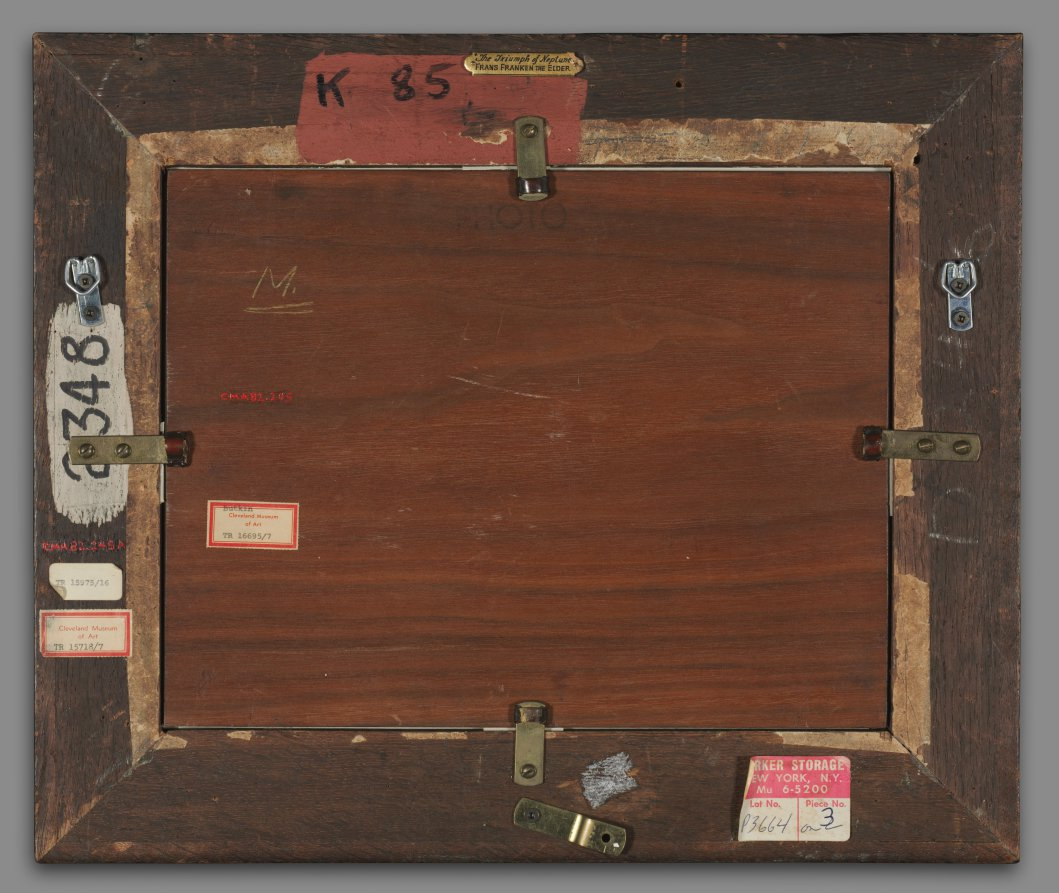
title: The Triumph of Neptune and Amphitrite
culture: Flanders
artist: Frans Francken (Flemish, 1581–1642)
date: 1630s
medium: oil on copper, mounted on wood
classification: Painting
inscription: signed lower right: D.O. ffranck. f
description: Neptune—the Roman god of water—and his wife, Amphitrite, ride a chariot pulled by sea horses. Water fowl and flying fish glide in the sky above them, while in the distance a group of nymphs beckon from a grotto. Neptune’s trident represents his power over water and storms; the fish, shells, coral, and pearls carried by his subjects show his wealth.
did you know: The smooth surface of the copper panel highlights Francken's delicate painting technique.